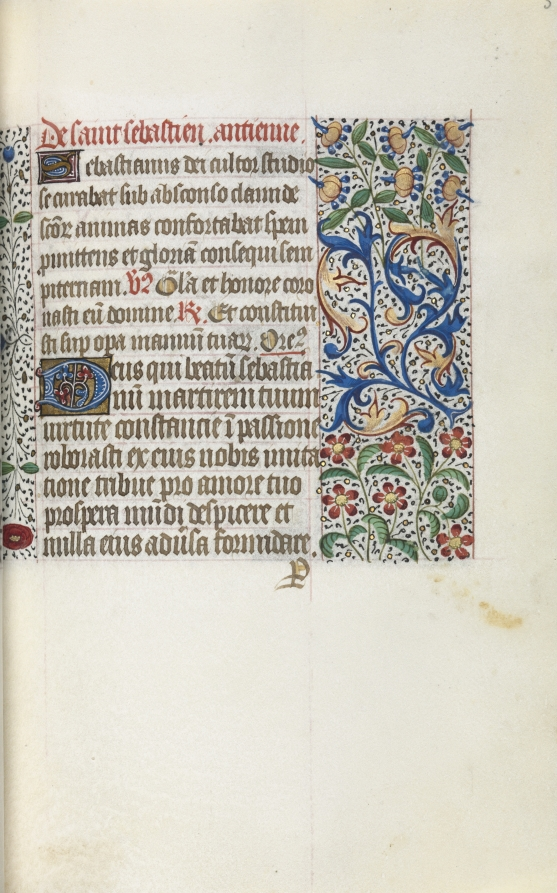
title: Book of Hours (Use of Rouen): fol. 52r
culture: France, Rouen, 15th century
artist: Master of the Geneva Latini (French, active Rouen, 1460–80)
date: c. 1470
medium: ink, tempera, and gold on vellum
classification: Bound Volume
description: In the late 1400s and early 1500s Rouen was an established and important center of book production. The city’s cathedral had a wealthy chapter that spent large sums of money to commission books and to maintain its extensive library. The stationers and booksellers would have likely been concentrated in or near the cathedral precinct. This artist, named after a manuscript now in Geneva, was Rouen’s principal illuminator during the second half of the 1400s.